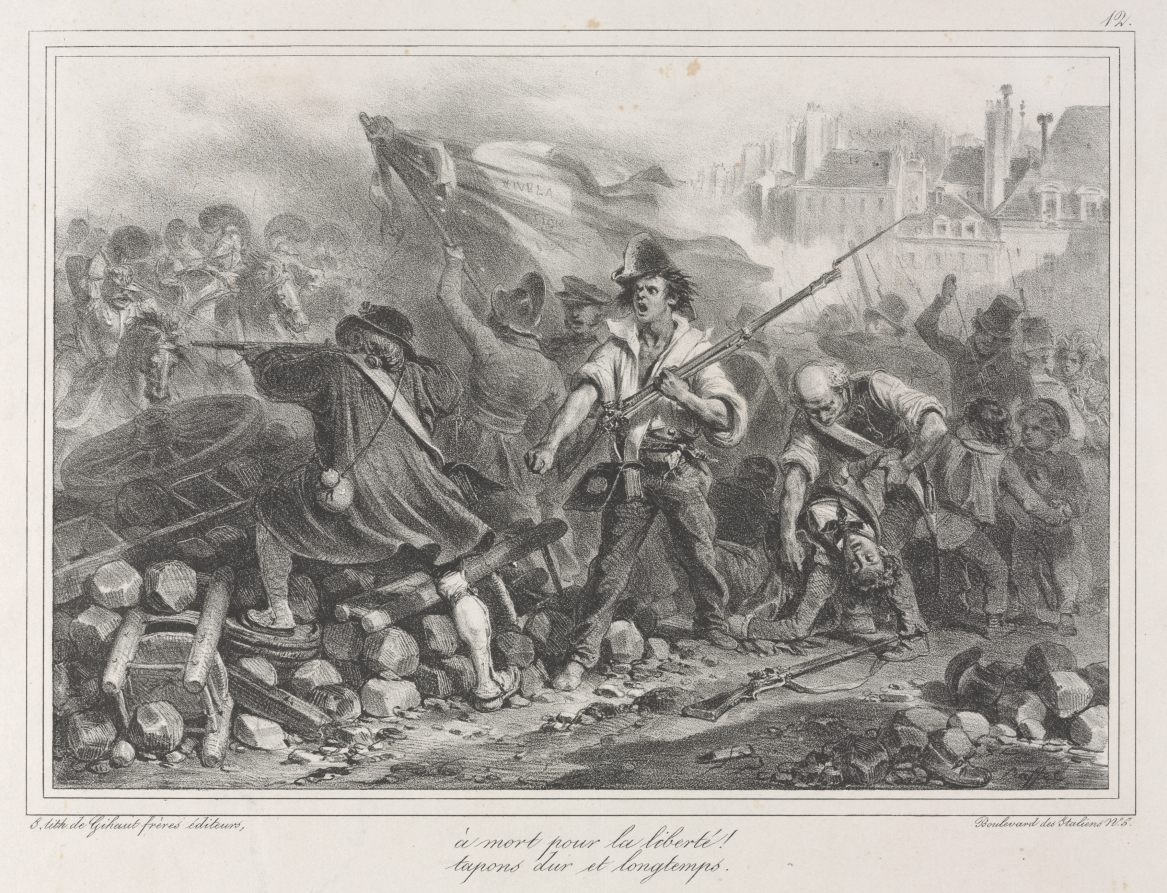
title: Album of 1831: Freedom or death!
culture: France, 19th century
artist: Auguste Raffet (French, 1804–1860)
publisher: Gihaut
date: 1831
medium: lithograph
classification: Print